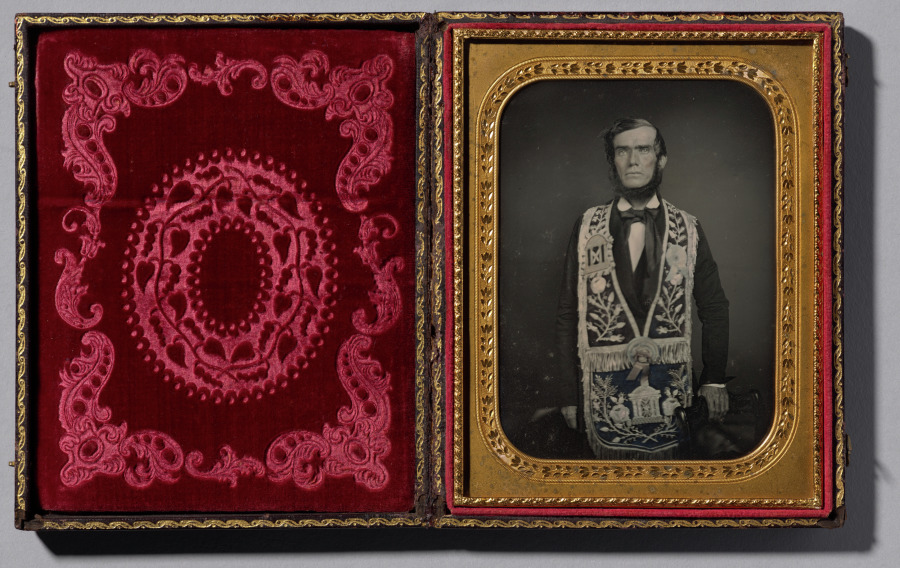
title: Secretary for a Lodge of a Temperance Organization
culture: America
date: c. 1854–55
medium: daguerreotype, half-plate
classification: Photograph